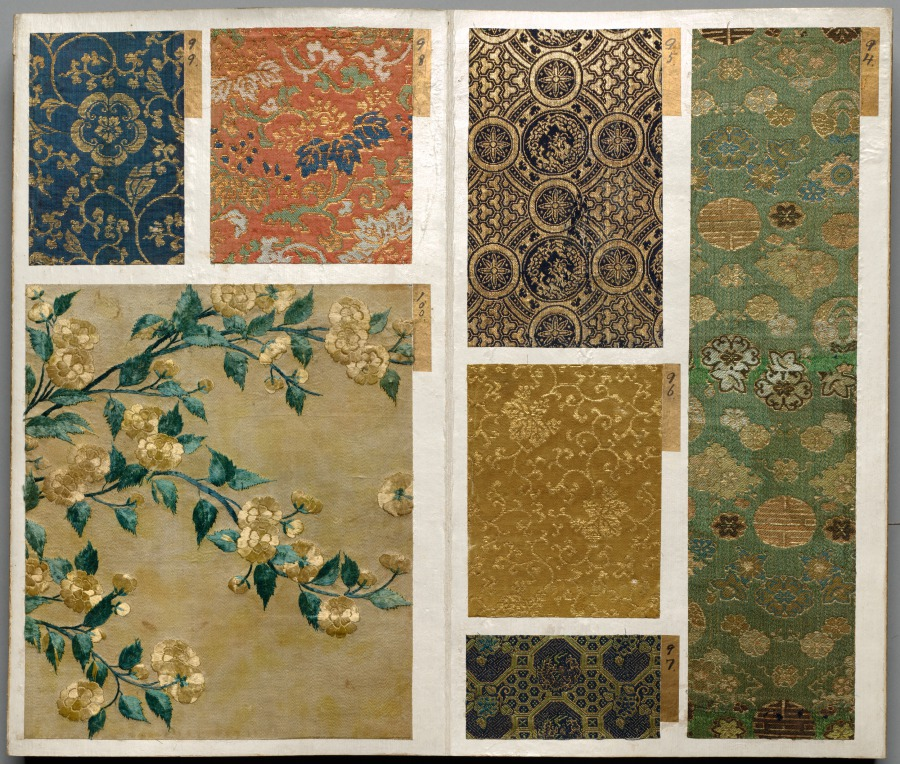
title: Album of Textile Samples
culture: Japan, Edo period (1615–1868)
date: 1600s-1700s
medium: silk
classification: Textile